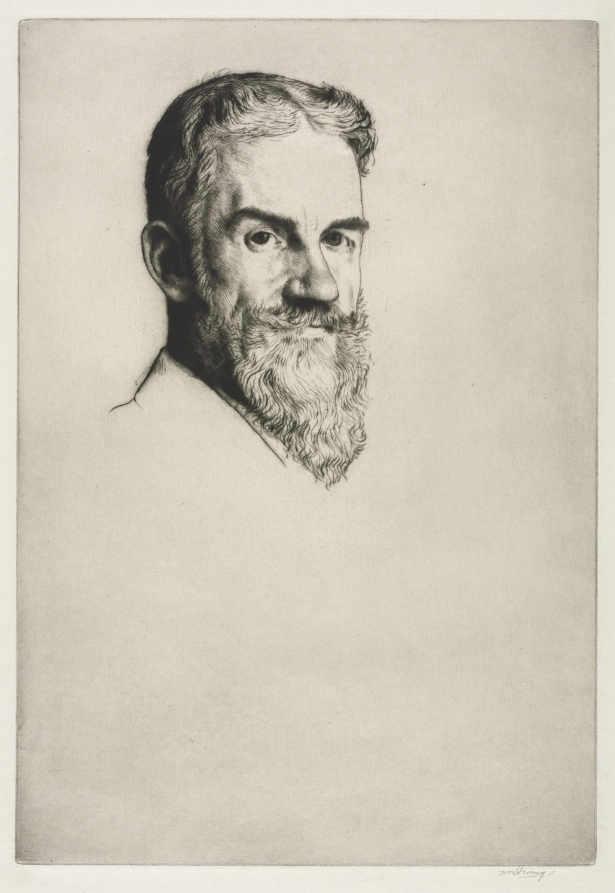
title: George Bernard Shaw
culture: England, early 20th Century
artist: William Strang (British, 1859–1921)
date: 1907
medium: drypoint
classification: Print